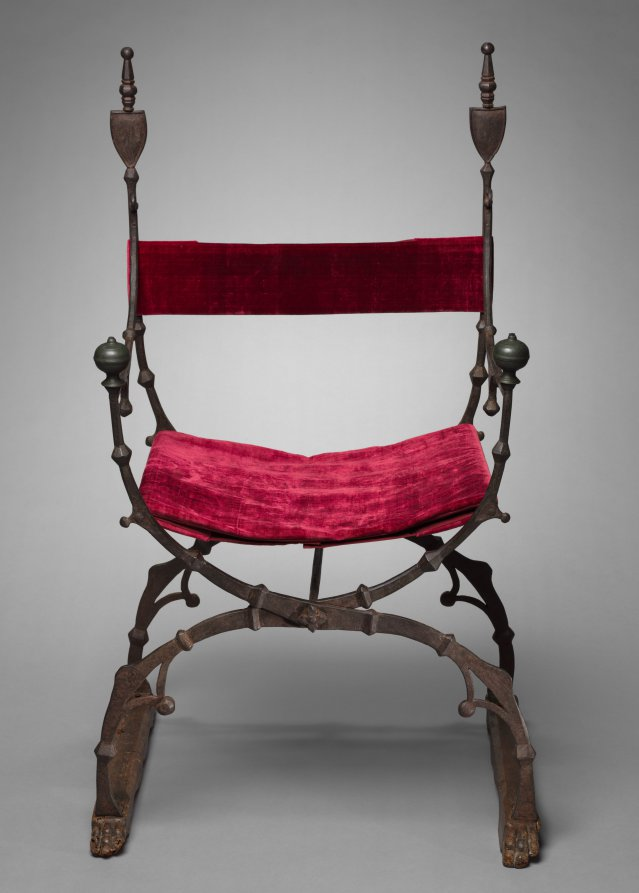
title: Curule (Folding) Chair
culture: Italy, Florence?, 15th century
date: c. 1450–1500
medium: forged iron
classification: Furniture and woodwork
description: This is a rare example of a Renaissance folding chair. It was intended to be lightweight and easily portable so that it could be folded and transported from room to room or even house to house. They were likely used in Italian homes, though they may have also been favored by scholars and clerics for use in their studies. Their portability also made them useful for extended travel. The fabric is a modern replacement.